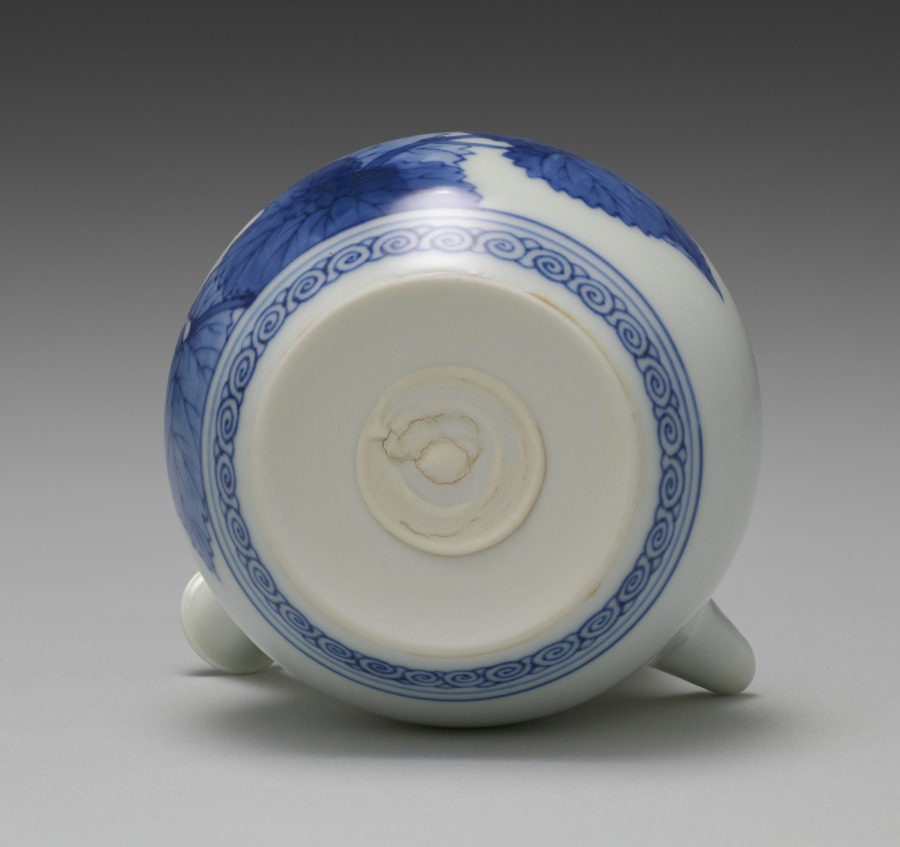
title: Teapot with Begonias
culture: Japan, Meiji period (1868–1912)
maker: Seifū Yohei III (Japanese, 1851–1914)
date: 1897–1914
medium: Porcelain with underglaze and overglaze colors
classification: Ceramic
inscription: 清風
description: This teapot has complex surface treatment: a design of begonias in modulated underglaze blue for the leaves and stems as well as thick overglaze white with incised lines to define the petals, plus small areas of underglaze yellow at their low-relief centers. A band of underglaze blue gives further definition to the lid’s handle, and the area just above the base has a double band of blue above a row of snail-shell curls. Unlike many other teapots, which have marks on their bases, this one has “Seifu” incised into one of its sides in relatively large characters. It is the side that would face the host if the teapot were held by the handle with the right hand, which would be the expectation.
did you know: This teapot with begonias combines underglaze blue with subtle use of yellow and white enamels.